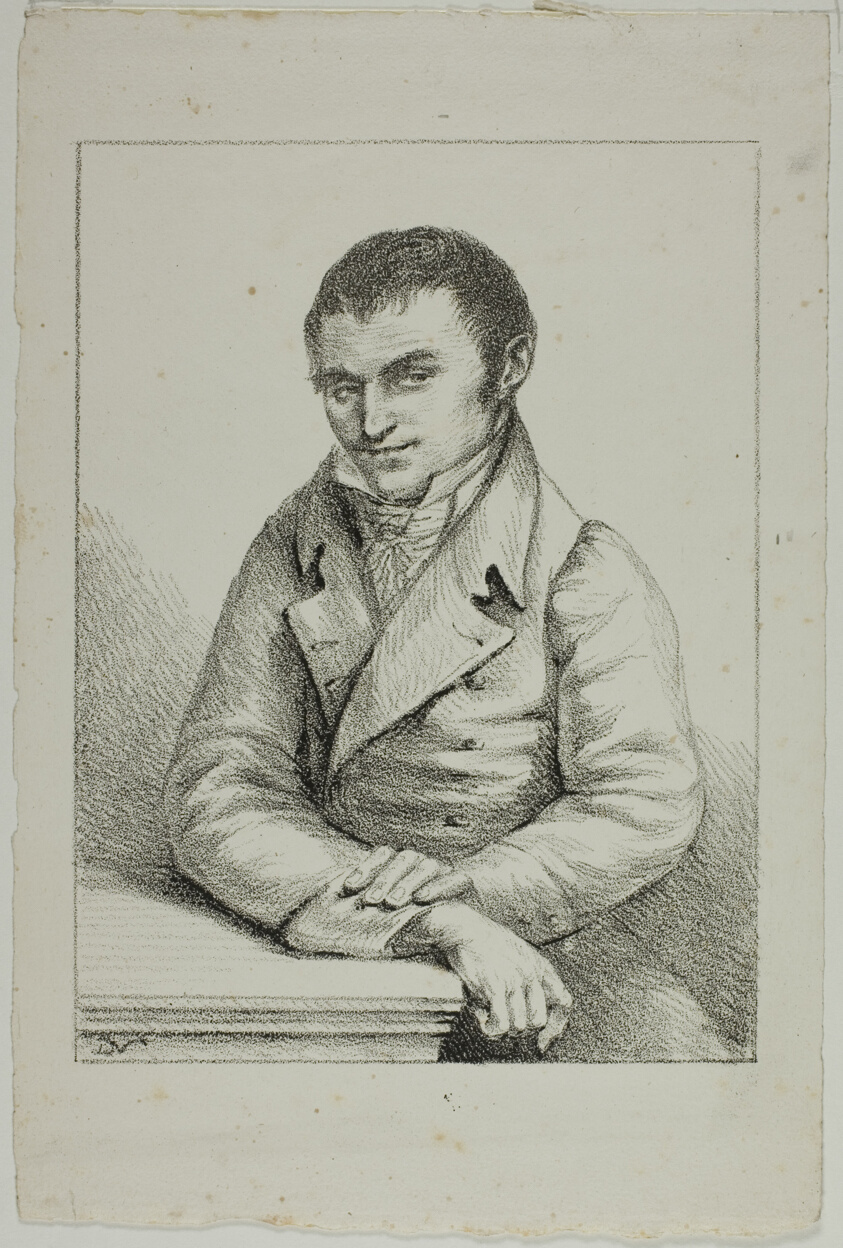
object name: Print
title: Portrait of Monsieur de Menneval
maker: Dominique-Vivant Denon (French, 1747-1825)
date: 1817–20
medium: Lithograph in black on ivory wove paper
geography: France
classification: lithograph; print; prints and drawing